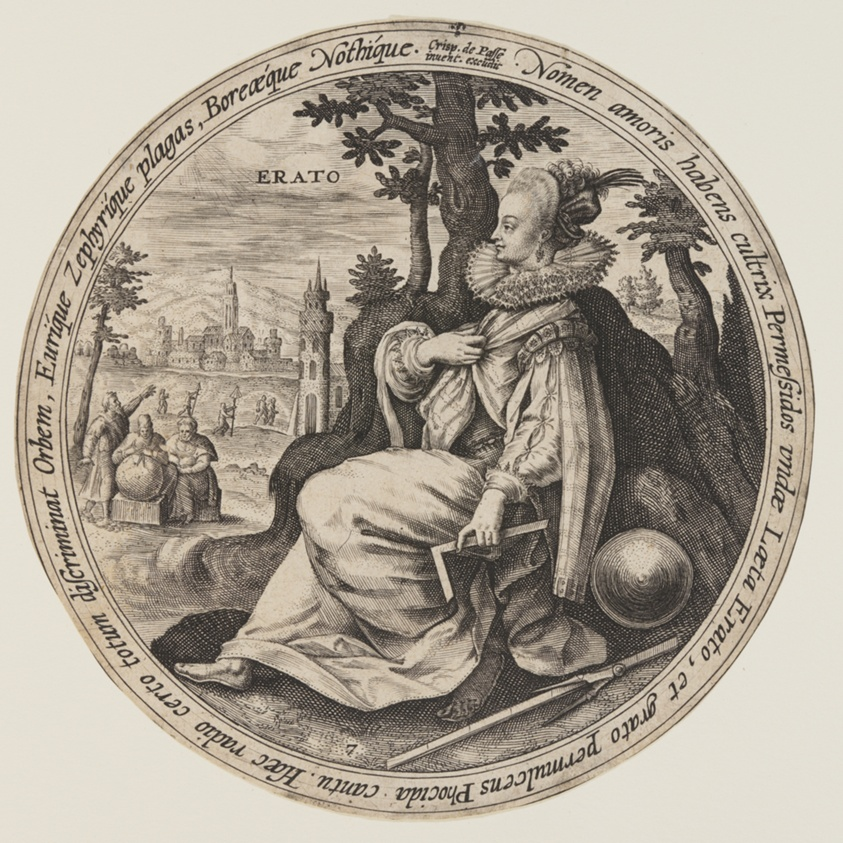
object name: Print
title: Urania, from The Muses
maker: Crispijn van de Passe I; Dutch, c. 1565–1637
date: c. 1590-1620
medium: Engraving on ivory laid paper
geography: Netherlands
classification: engraving; paper; print; prints and drawing